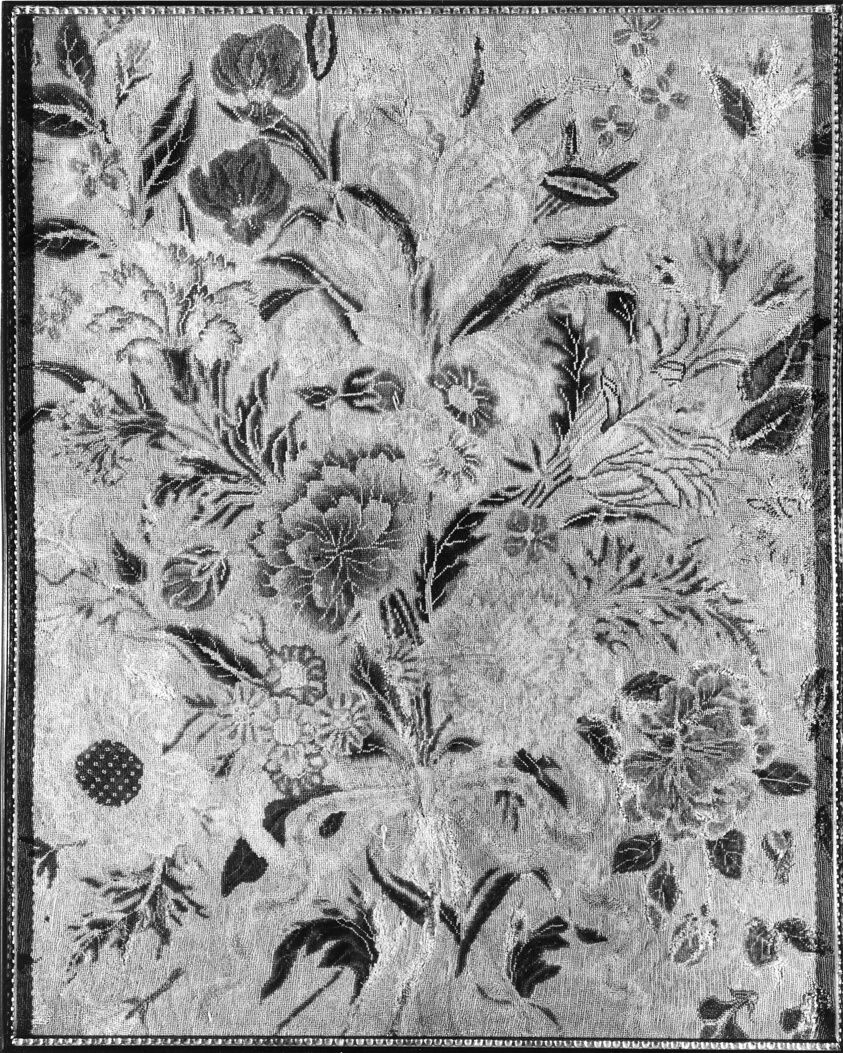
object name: Textile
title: Picture (Needlework)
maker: England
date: 18th century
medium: Linen, plain weave; embroidered with silk and wool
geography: England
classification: textile; needlework (visual works)